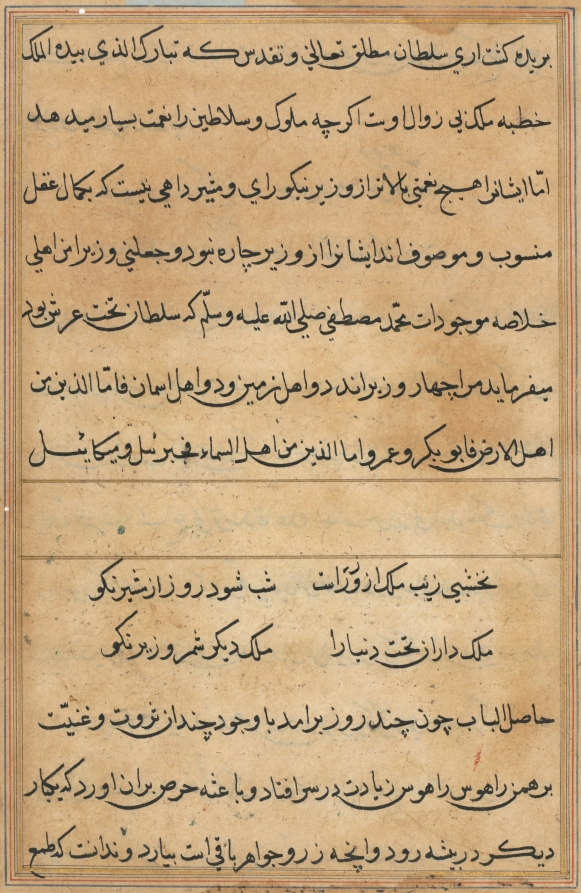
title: Page from Tales of a Parrot (Tuti-nama): text page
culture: Mughal India, court of Akbar (reigned 1556–1605)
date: c. 1560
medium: gum tempera, ink, and gold on paper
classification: Painting